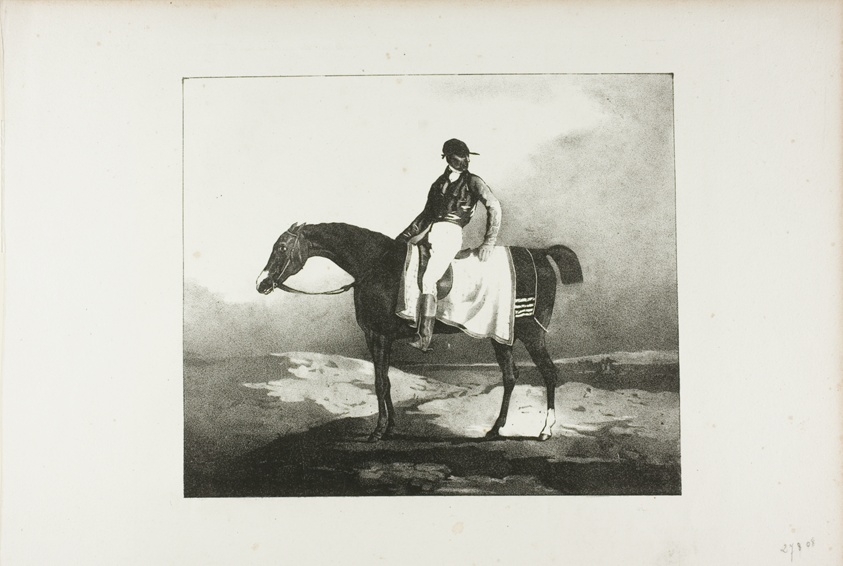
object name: Print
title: Jockey Astride an English Horse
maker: Louis-Pierre-Marie Courtin (French, active 1830); after Jean Louis André Théodore Géricault (French, 1791-1824)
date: 1823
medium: Lithograph in black on ivory wove paper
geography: France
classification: lithograph; print; prints and drawing